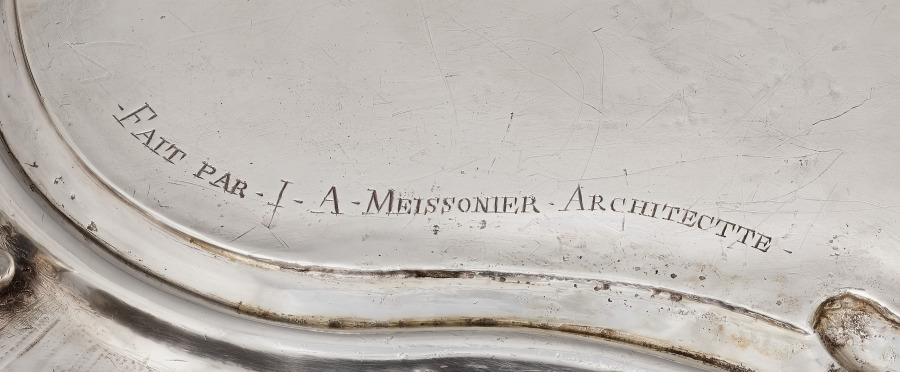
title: Stand for a Covered Tureen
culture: France, Paris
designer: Juste-Aurèle Meissonnier (French, 1695–1750)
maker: Pierre-François Bonnestrenne (French)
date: 1735–38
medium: silver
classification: Silver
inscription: engraved Meissonnier signature.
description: See entry for cover record 1977.182.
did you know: The langoustine, pigeon, and vegetables were cast using real examples giving the silver copies lifelike detail and appearance.